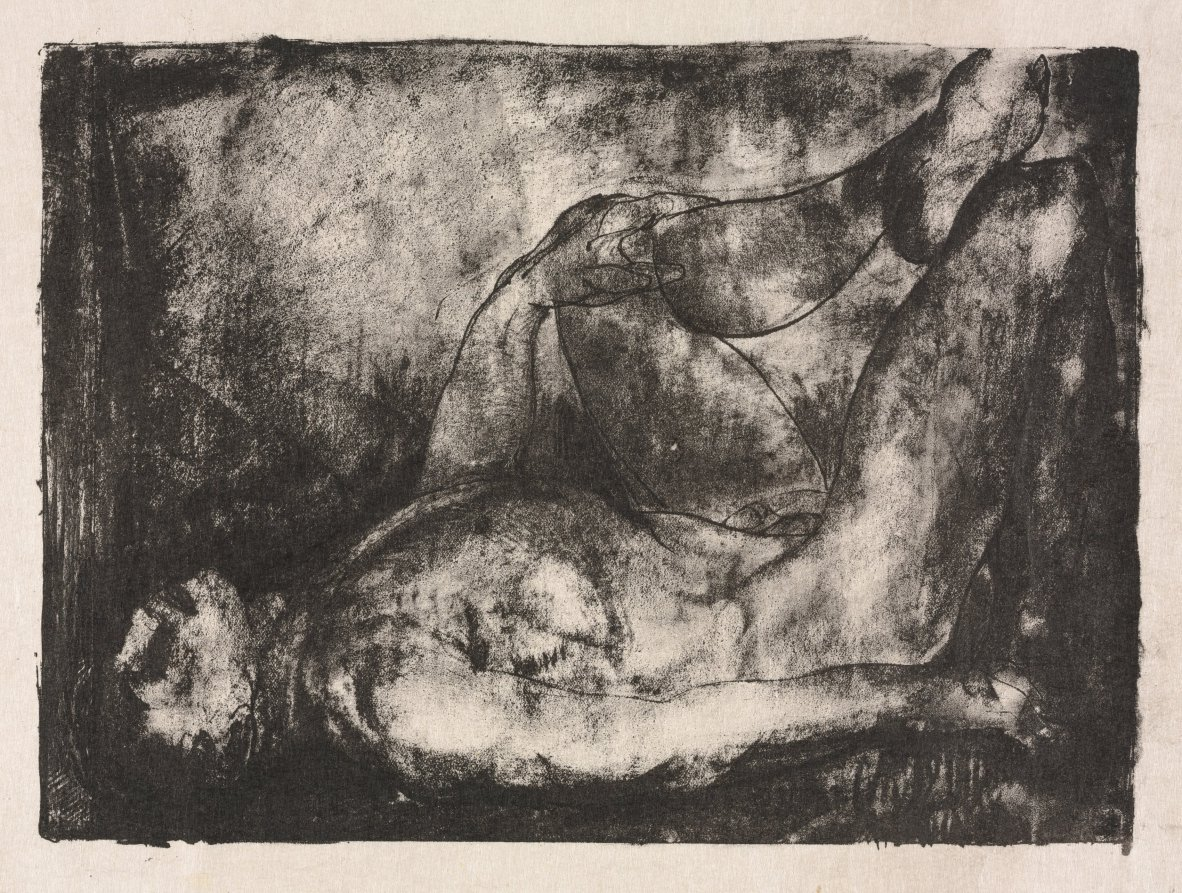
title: Man on his Back, Nude, Second State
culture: America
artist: George Bellows (American, 1882–1925)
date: 1916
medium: lithograph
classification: Print